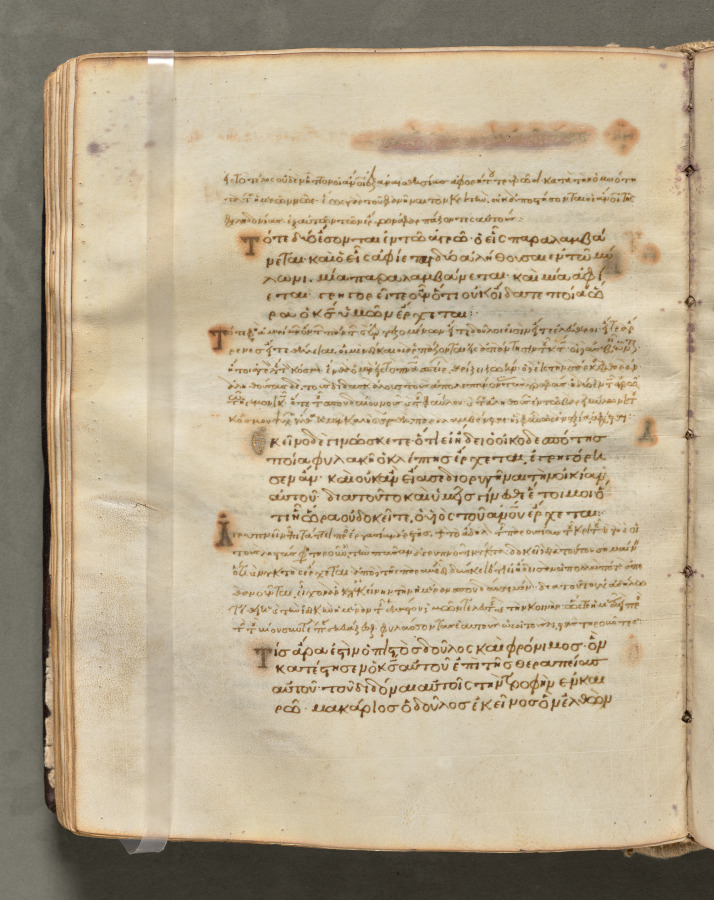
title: Text, folio 108 (verso), from a Gospel Book with Commentaries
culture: Byzantium, Constantinople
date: c. 1000–1100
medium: ink, tempera, and gold on vellum; leather binding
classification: Bound Volume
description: Each of the four gospels in this book opens on a page with brilliantly illuminated borders depicting the author of the text as well as birds-principally peacocks, symbols of the immortality of the soul-and fountains, representing the fountain of life and the salvation of the soul. This volume consists of 428 leaves with texts in Greek. Its level of sophistication suggests that it was probably written and decorated in a monastery in Constantinople.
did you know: Gospel Books were carried in procession through Byzantine churches.